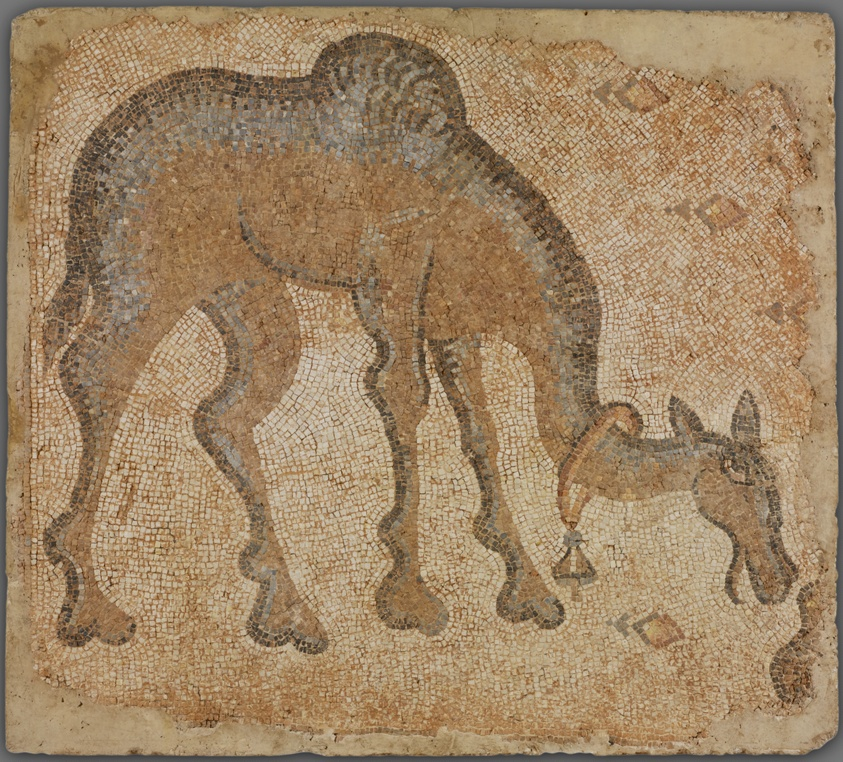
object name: Architectural fragment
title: Mosaic Fragment with Grazing Camel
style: byzantine, ancient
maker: Byzantine; Eastern Mediterranean, probably Syria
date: 5th century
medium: Stone in mortar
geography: Byzantine Empire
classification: architectural fragment; mosaic; ancient art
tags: animals